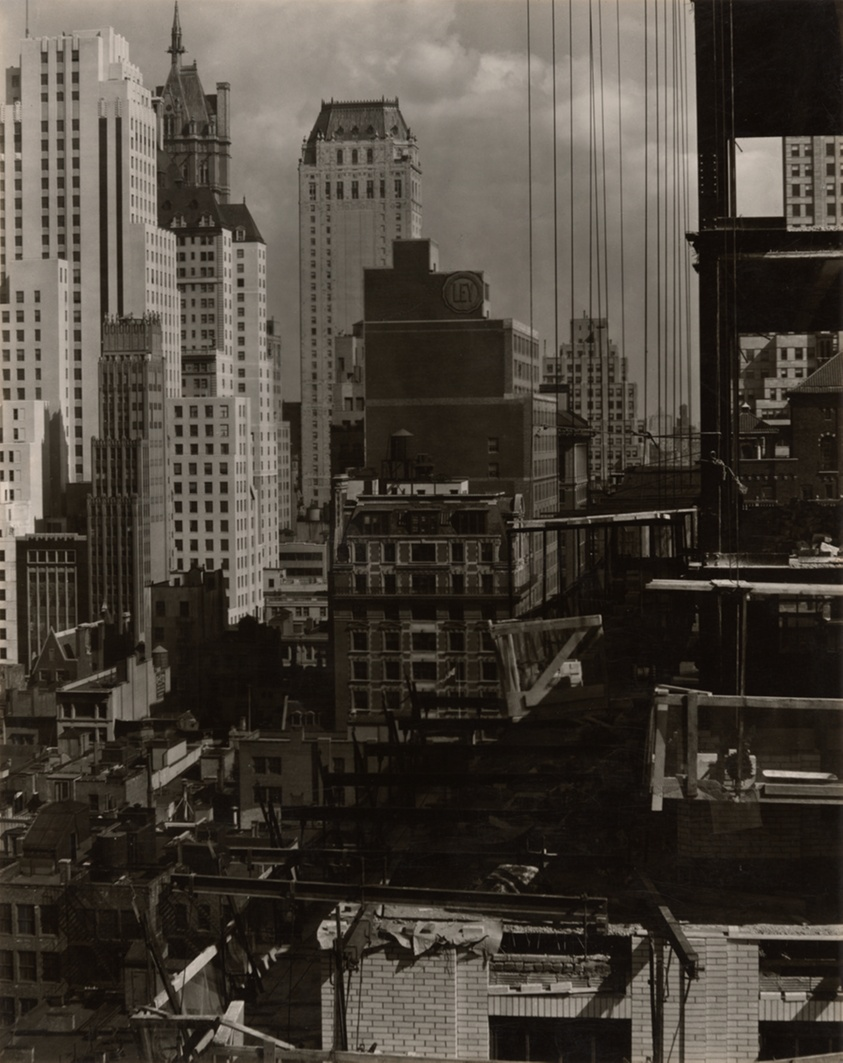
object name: Photograph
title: From My Window at An American Place, North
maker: Alfred Stieglitz (American, 1864–1946)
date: 1931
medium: Gelatin silver print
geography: United States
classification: gelatin silver (developing-out-paper) pr; photographic process; photography; photograph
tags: cityscapes